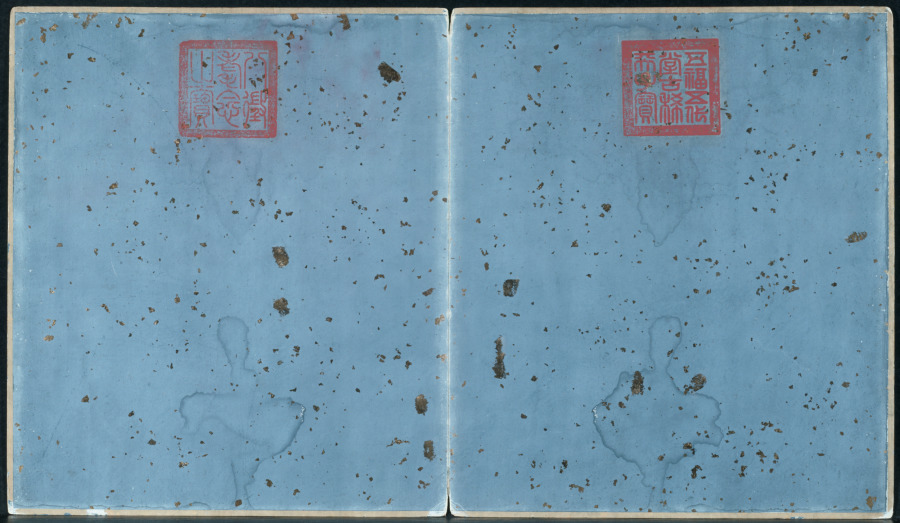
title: Battle Scenes of the Quelling of Rebellions in the Western Regions, with Imperial Poems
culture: China, Qing dynasty (1644–1911), Qianlong reign (1736–95)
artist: Giuseppe Castiglione (Italian, 1688–1766)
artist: Jean Damascene Sallusti (Italian, d. 1781)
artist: Jean Denis Attiret (French, 1702–1768)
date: c. 1765–74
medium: Etchings, mounted in album form, 16 leaves plus two additional leaves of inscriptions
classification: Print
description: This set of etchings was commissioned by Emperor Qianlong to record in pictorial terms the courage of his generals and soldiers in quelling the rebellions in the Western Regions. Qianlong added his own poem to each of the etchings, indicating his appreciation and pride in this demonstration of military might. "Western Regions" refers to the present-day Xingjiang province, often described in Western writing as "Central Asia."